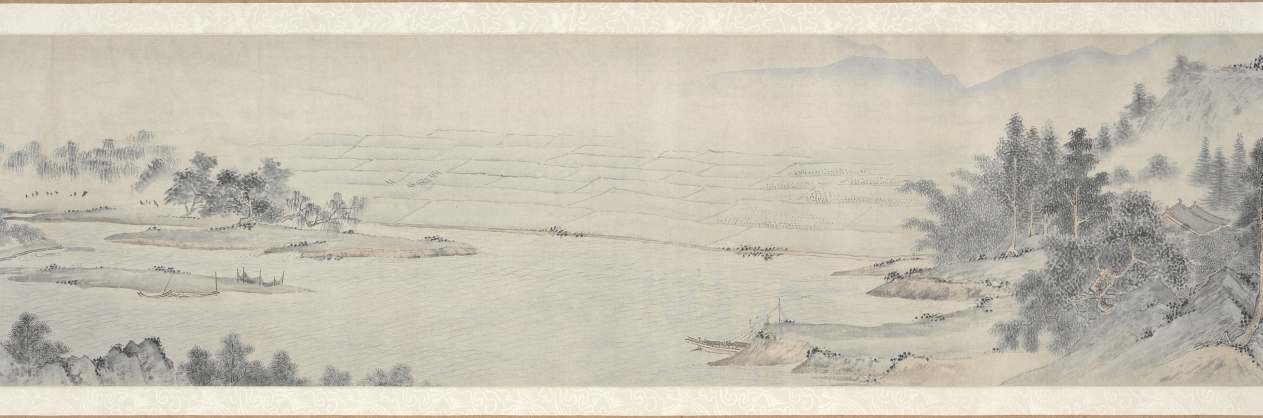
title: Ten Thousand Li of the Yangzi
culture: China, Ming dynasty (1368–1644)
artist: Dai Jin (Chinese, 1388–1462)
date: c. 1400s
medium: Handscroll; ink and color on paper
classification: Painting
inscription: Two colophons at end. Artist's seals: Dai Jin 戴進 and Wenjin 文進.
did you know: Dai Jin is traditionally considered the founder of the Zhe School, a style of landscape painting.